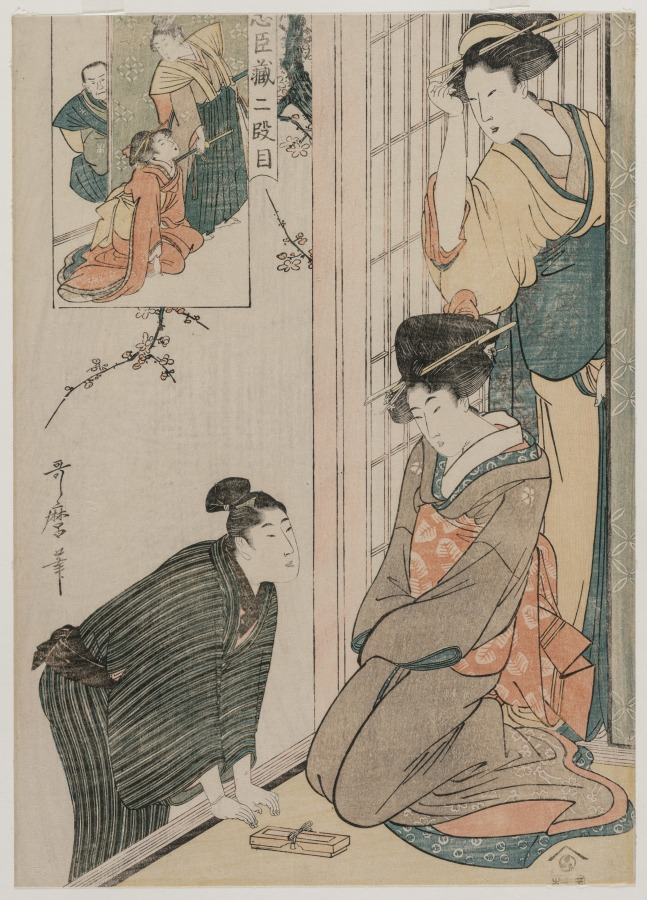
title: Chushingura: Act II of The Storehouse of Loyalty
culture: Japan, Edo period (1615–1868)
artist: Kitagawa Utamaro (Japanese, c. 1754–1806)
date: late 1790s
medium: color woodblock print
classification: Print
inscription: Signature: Utamaro hitsu Publisher: Nishimuraya Yohachi (Eiju han, emblem)